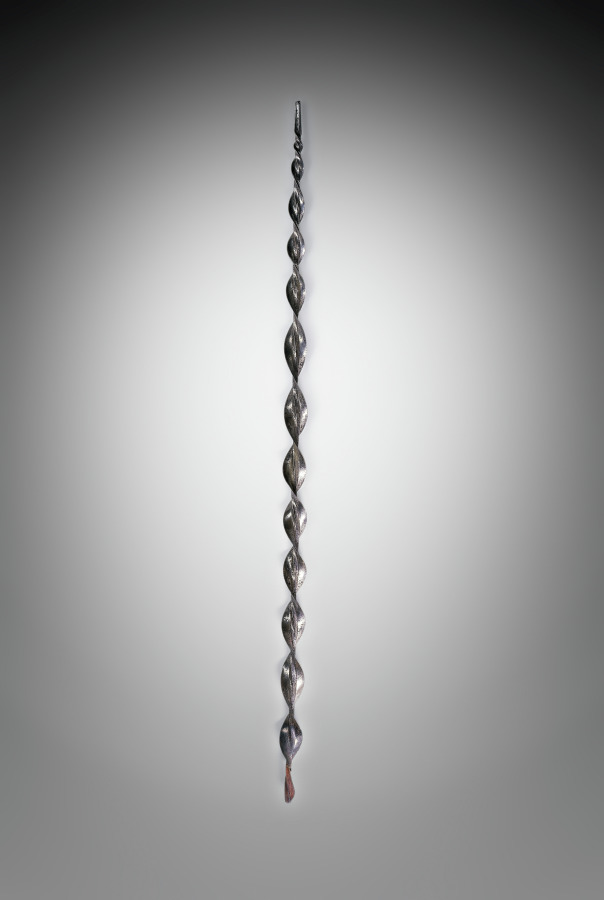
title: Sword (Laughing Head in Grotesque Hat for Hilt)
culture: Italy, 17th century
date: 1600s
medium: steel and bronze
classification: Arms and Armor